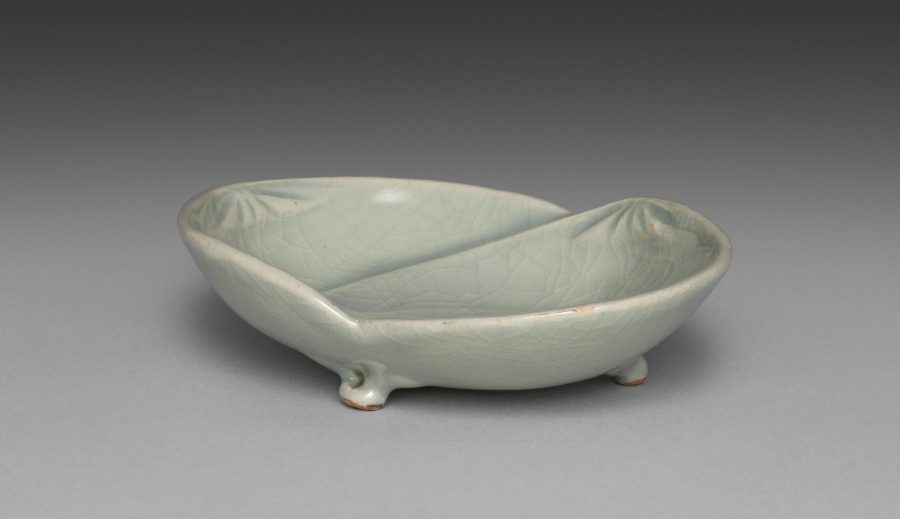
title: Dish from Dishes with Matching Shells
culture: Japan, Meiji period (1868–1912)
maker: Seifū Yohei III (Japanese, 1851–1914)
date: 1893–1914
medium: One of a pair of dishes; porcelain with celadon glaze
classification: Ceramic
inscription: 清風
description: Yohei III’s main output for his sophisticated clientele was in the form of tea sets and dining sets. He created a range of dishes in green glazes. He often produced in pairs, sets of five, or sets of ten. This pair of shell dishes have a box lid interior attestation by Yohei IV that the dishes were made by Yohei III with a cracked-ice (hyōretsu) pattern in the glaze, omitting reference to any glaze coloration.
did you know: These shell-shaped dishes are of the saucer type, suitable for dipping sauces.